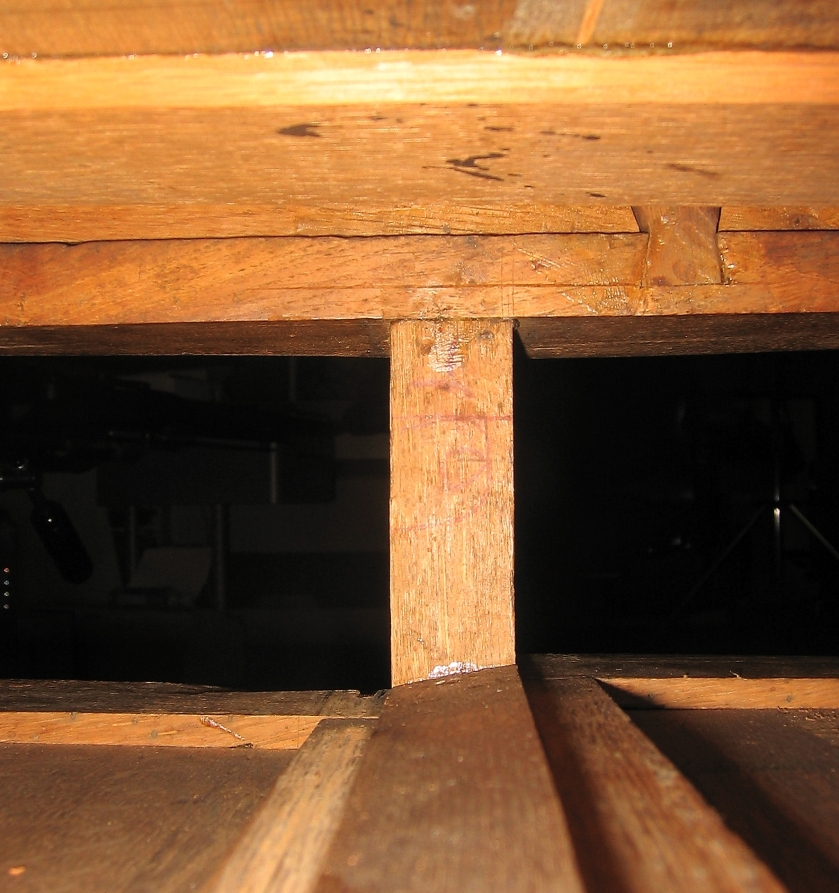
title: Table Desk (Bureau Plat)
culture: France, 18th century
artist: Bernard II van Riesen Burgh (Dutch, 1766)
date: c. 1750– 1760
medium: wood marquetry with gilt bronze mounts, leather top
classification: Furniture and woodwork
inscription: signed three times on bottom edge of apron: B. V. R. B.